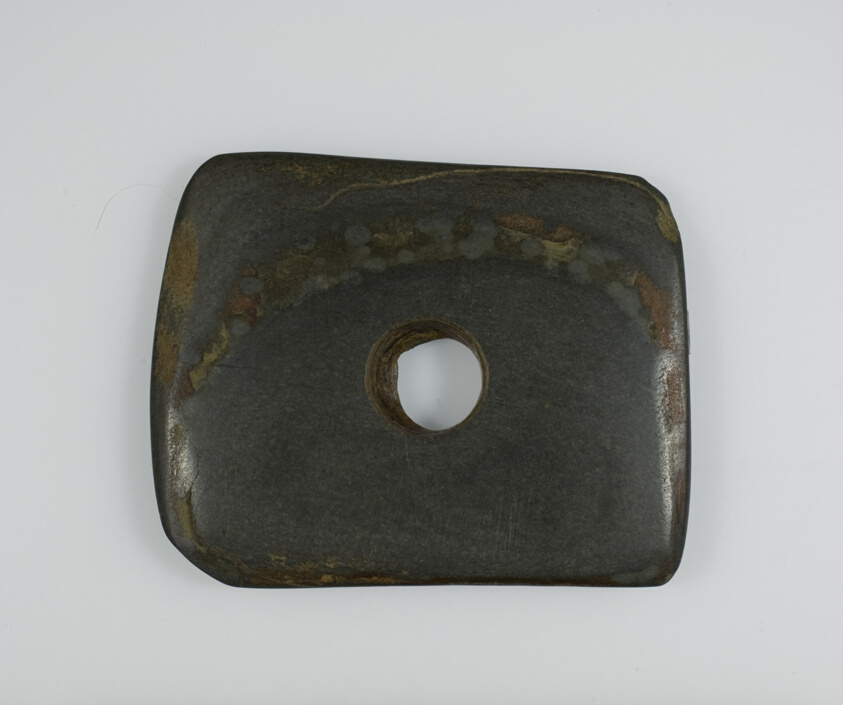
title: Axe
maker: China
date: Shang dynasty (c.1600–1046 BC)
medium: Jade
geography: China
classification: jade; asian art